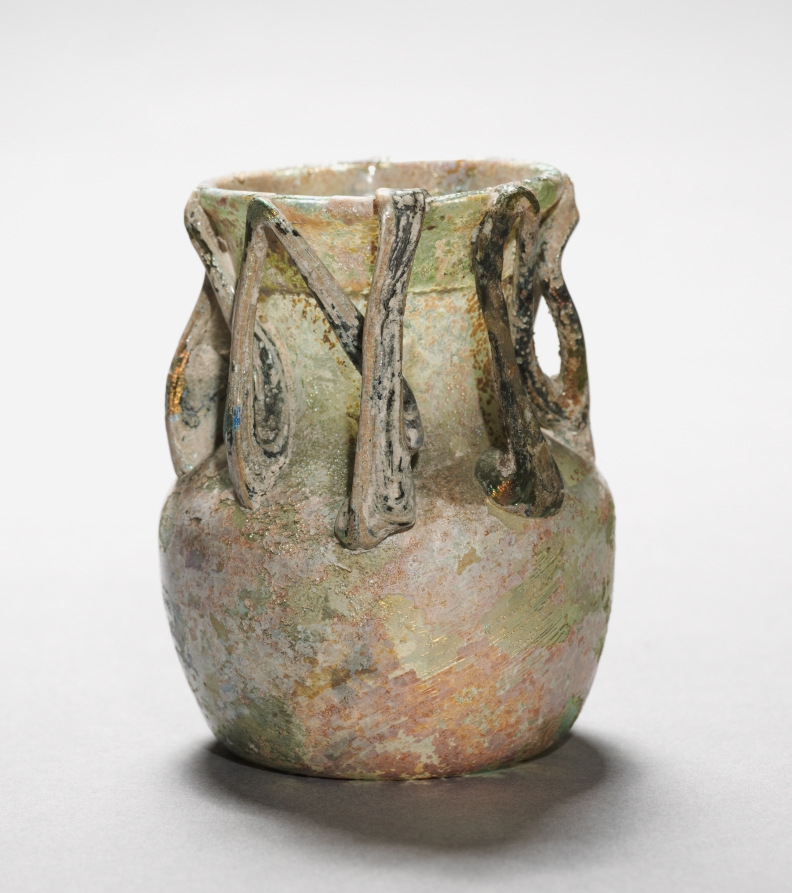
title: Vase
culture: Italy, Roman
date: 100–300 CE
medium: glass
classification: Glass